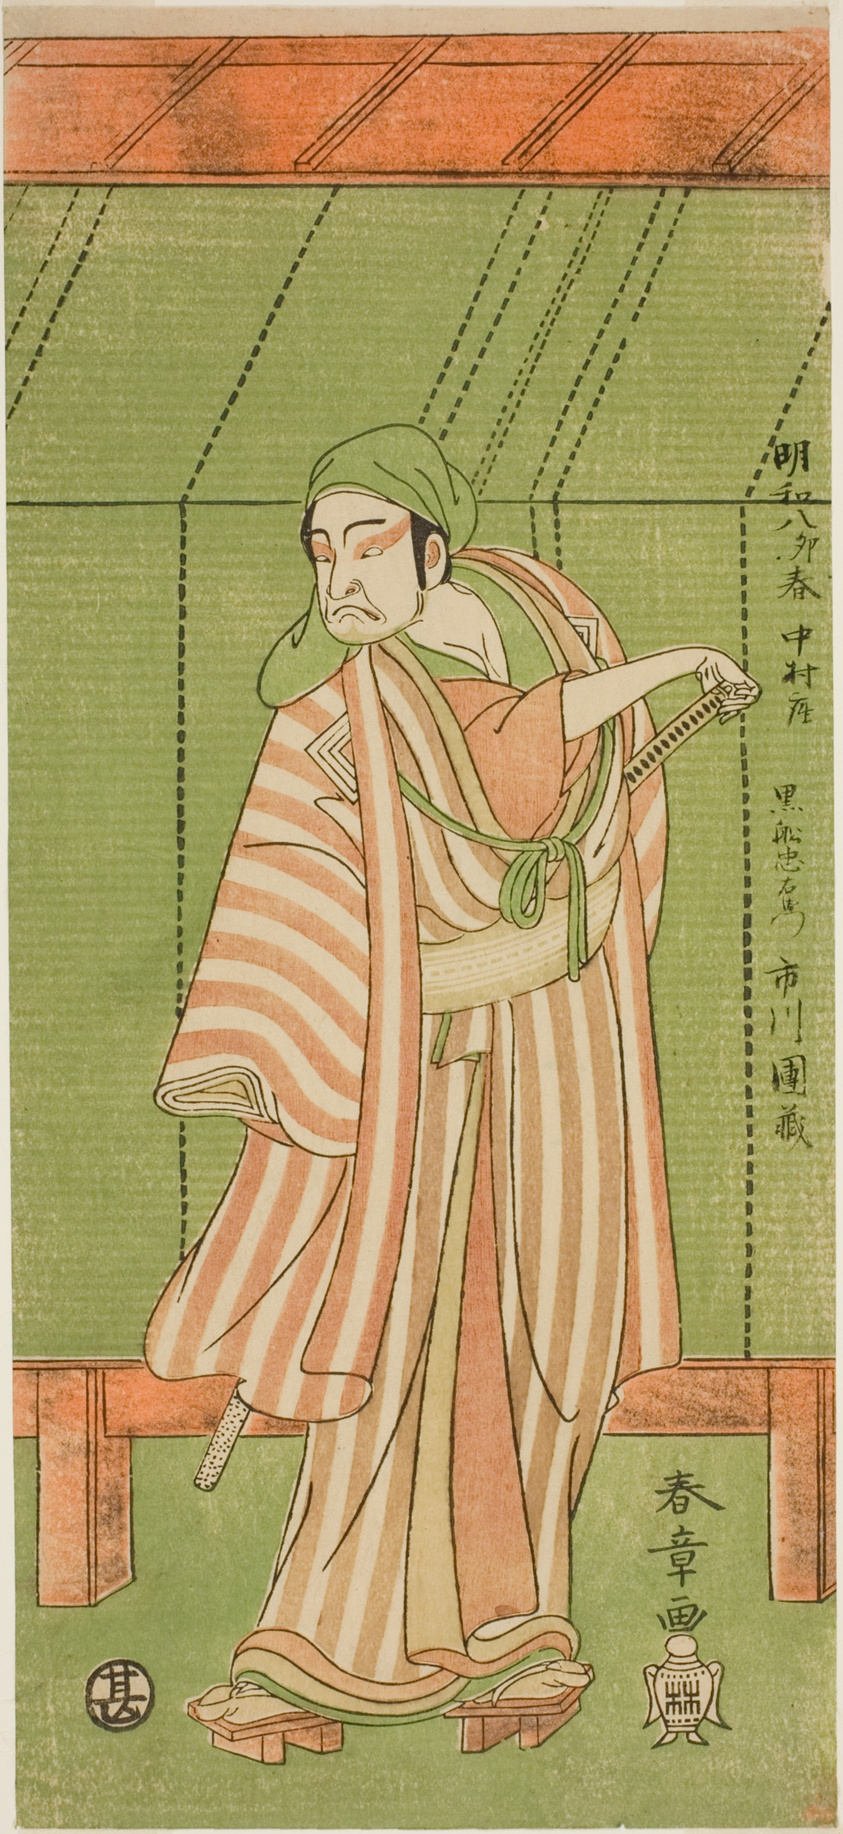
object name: Print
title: The Actor Ichikawa Danzo III as the Boathouse Man Kurofune Chuemon in the Play Sakai-cho Soga Nendaiki, Performed at the Nakamura Theater in the First Month, 1771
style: Japanese (culture or style)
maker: Katsukawa Shunsho 勝川 春章; Japanese, 1726-1792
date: c. 1771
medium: Color woodblock print; hosoban; from a multisheet composition (?)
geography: Japan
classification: woodblock print; print; asian art